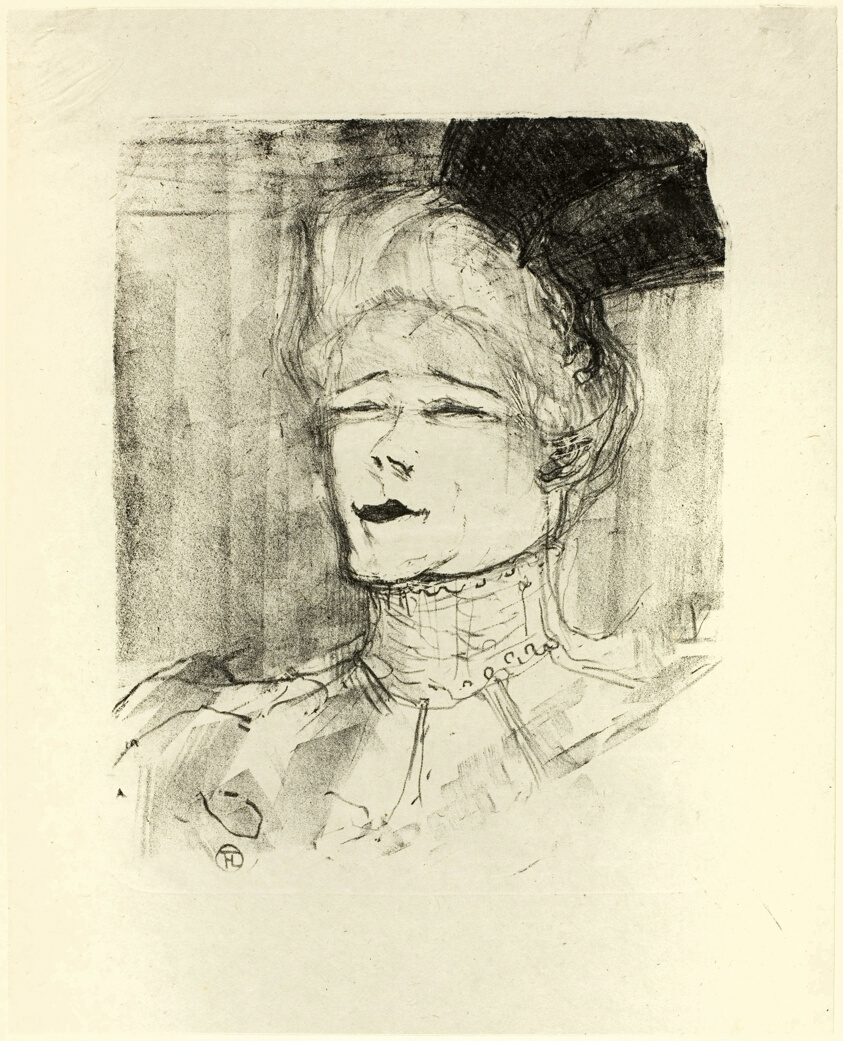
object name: Print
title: Jeanne Granier, from Treize Lithographies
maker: Henri de Toulouse-Lautrec (French, 1864-1901)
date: 1898, published before 1906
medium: Lithograph on ivory laid paper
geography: France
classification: lithograph; print; prints and drawing